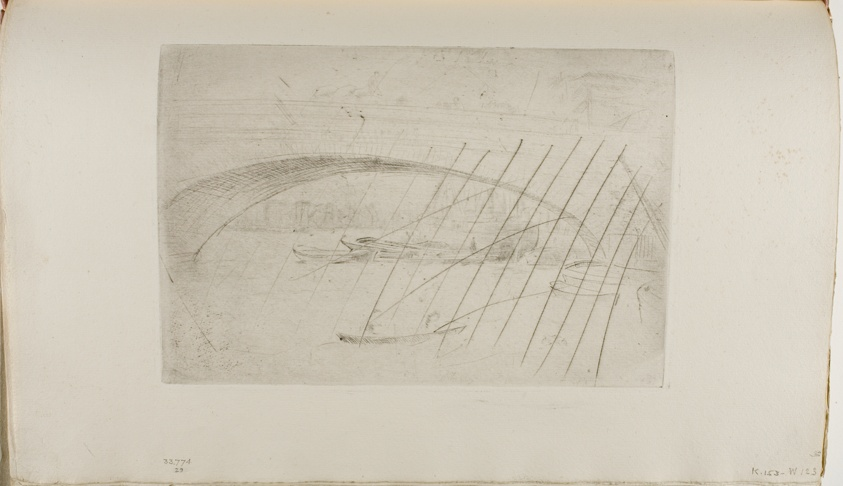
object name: Print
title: London Bridge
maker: James McNeill Whistler (American, 1834-1903)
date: 1877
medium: Drypoint with foul biting, with drypoint cancellation, in black ink on ivory laid paper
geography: United States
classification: drypoint; prints and drawing; book; foul biting; print; paper